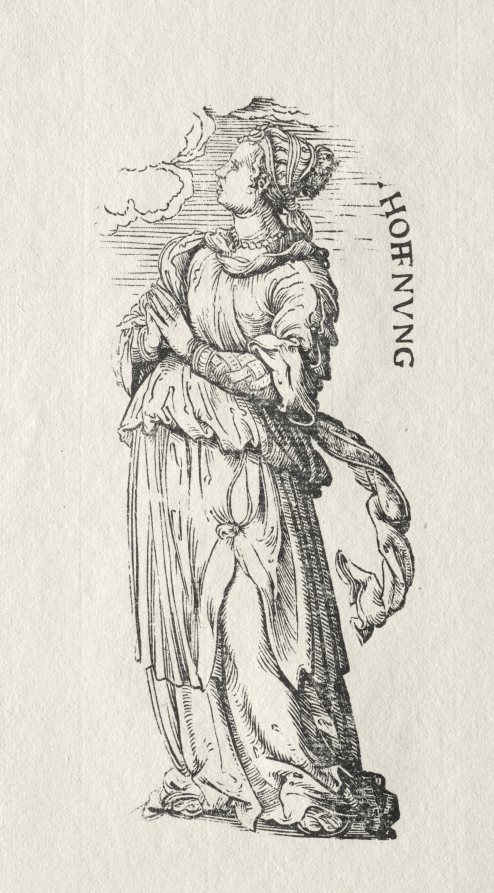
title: The Seven Virtues: Hope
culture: Germany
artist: Hans Burgkmair (German, 1473–1531)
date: 1510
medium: woodcut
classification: Print